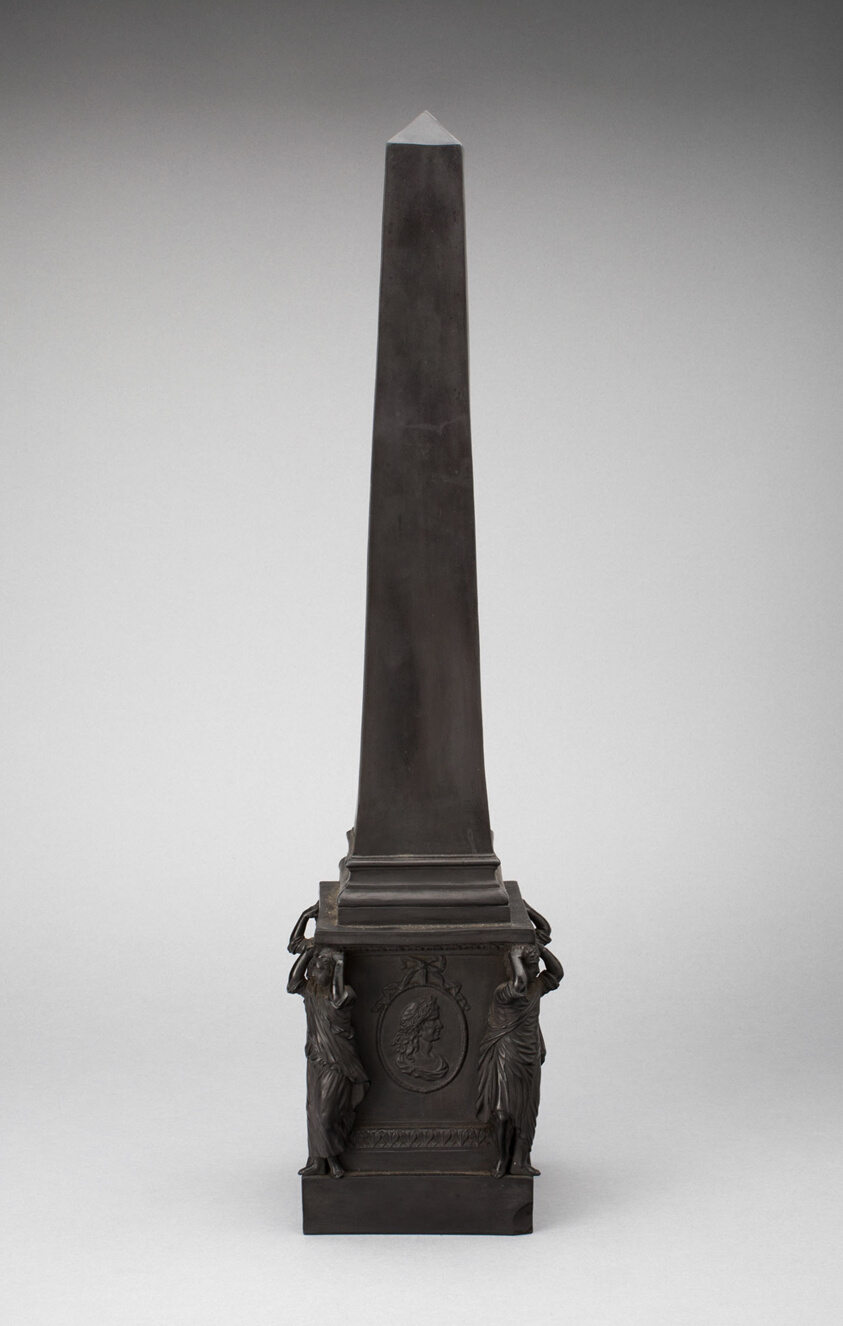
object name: Ceramics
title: Obelisk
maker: Wedgwood Manufactory (England, founded 1759)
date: c. 1800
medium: Stoneware (basaltware)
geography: Burslem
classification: sculpture; ceramics; stoneware; european decorative arts